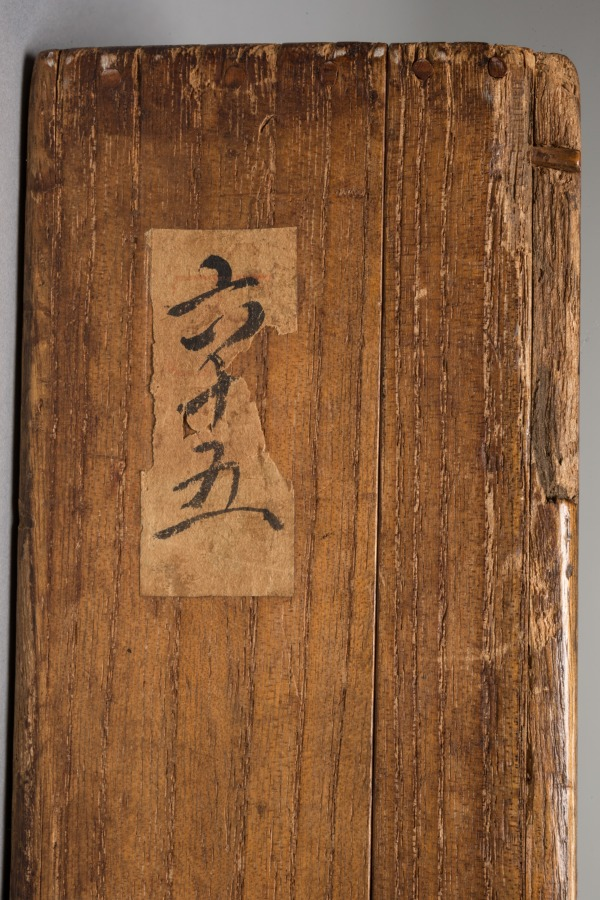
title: Bamboo in Rain; Bamboo in Wind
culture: Japan, Muromachi period (1392–1573)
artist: Genga (Japanese)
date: early 1500s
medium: hanging scroll; ink on silk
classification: Painting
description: East Asian paintings from China, Korea, and Japan were frequently conceived as sets of multiple images. These sets might have been composed for specific palace or temple rooms, or to portray a specific theme, such as the four seasons. Over time, the original intent of such sets is often lost through damage, changes in ownership, or a variety of other reasons. The identity of the artist can also be lost, but then, sometimes, retrieved. This pair of ink paintings has traditionally been labeled as Japanese and attributed to the 16th-century painter Genga. Since there are no seals or signature of the artist on the painting, this attribution was based on comparisons of brush style with paintings known to be by Genga. More recent study indicates that while the 16th century is an appropriate time frame for the pair, the precise cultural identity of the artist is not certain after all. The dark, eccentric shapes of the rocks and bamboo clusters and the dramatic tonal contrasts evident throughout the composition point to either Korean authorship or influence upon a Japanese painter of the period.